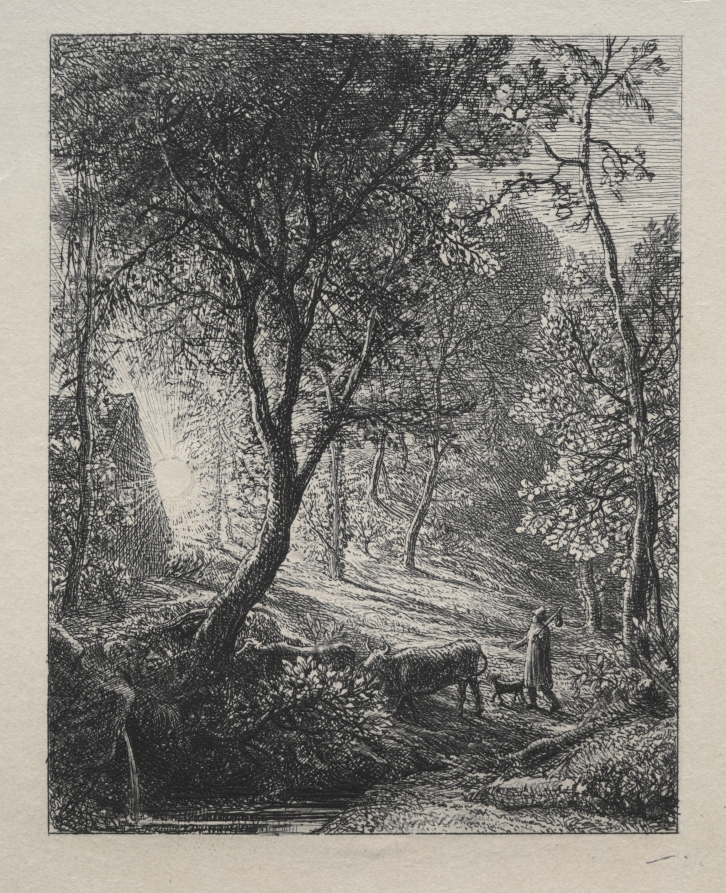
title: The Herdsman's Cottage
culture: England, 19th century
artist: Samuel Palmer (British, 1805–1881)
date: 1850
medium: etching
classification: Print